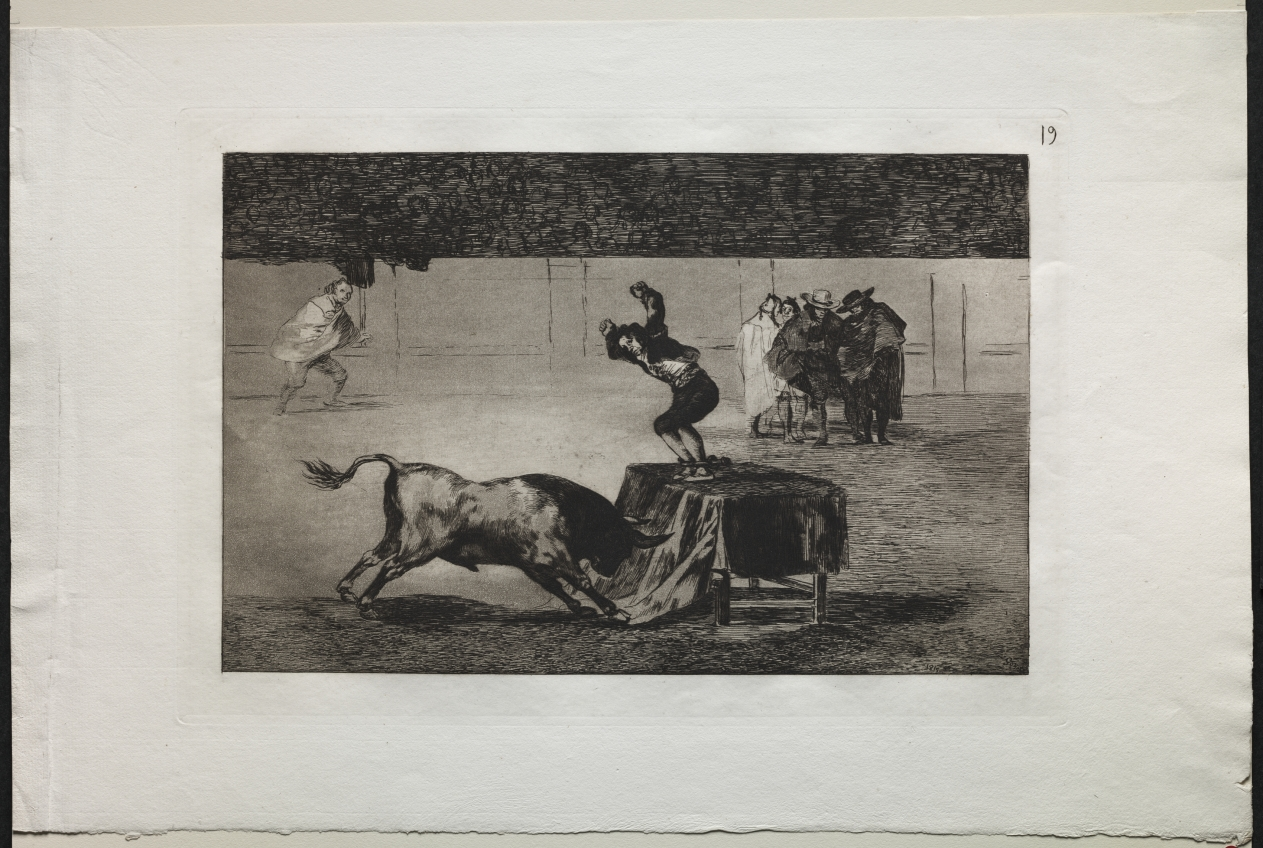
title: Bullfights: Another Madness of his in the Same Ring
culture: Spain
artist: Francisco de Goya (Spanish, 1746–1828)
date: 1816, printed 1876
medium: engraving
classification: Print